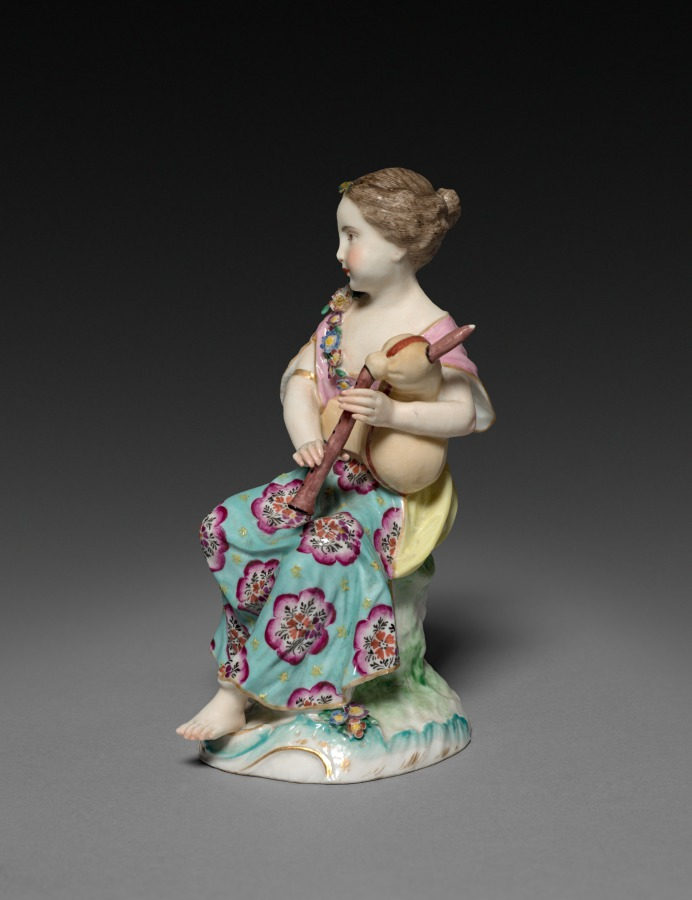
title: Girl Musician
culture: Germany, 18th century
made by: Frankenthal Porcelain Factory (German)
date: c. 1770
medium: porcelain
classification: Ceramic